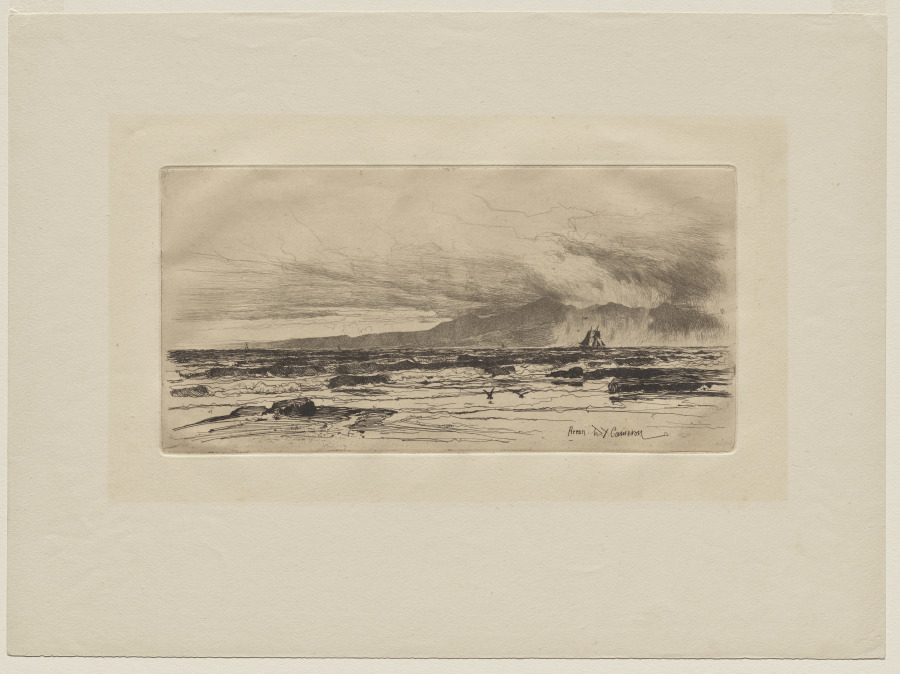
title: Arran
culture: England, late 19th Century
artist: David Young Cameron (British, 1865–1945)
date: 1889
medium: etching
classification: Print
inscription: signed in plate